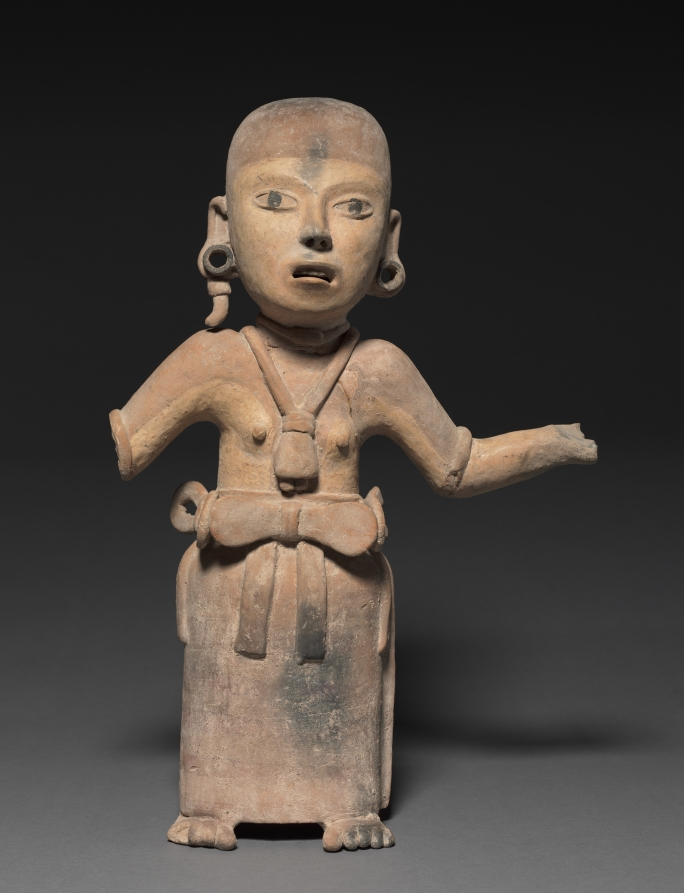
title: Female Figure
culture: Mexico, Southern Veracruz, Limon, Remojades Monumental Sculpture type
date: 200–500 CE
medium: pottery with burnished buff slip and asphalt paint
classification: Sculpture